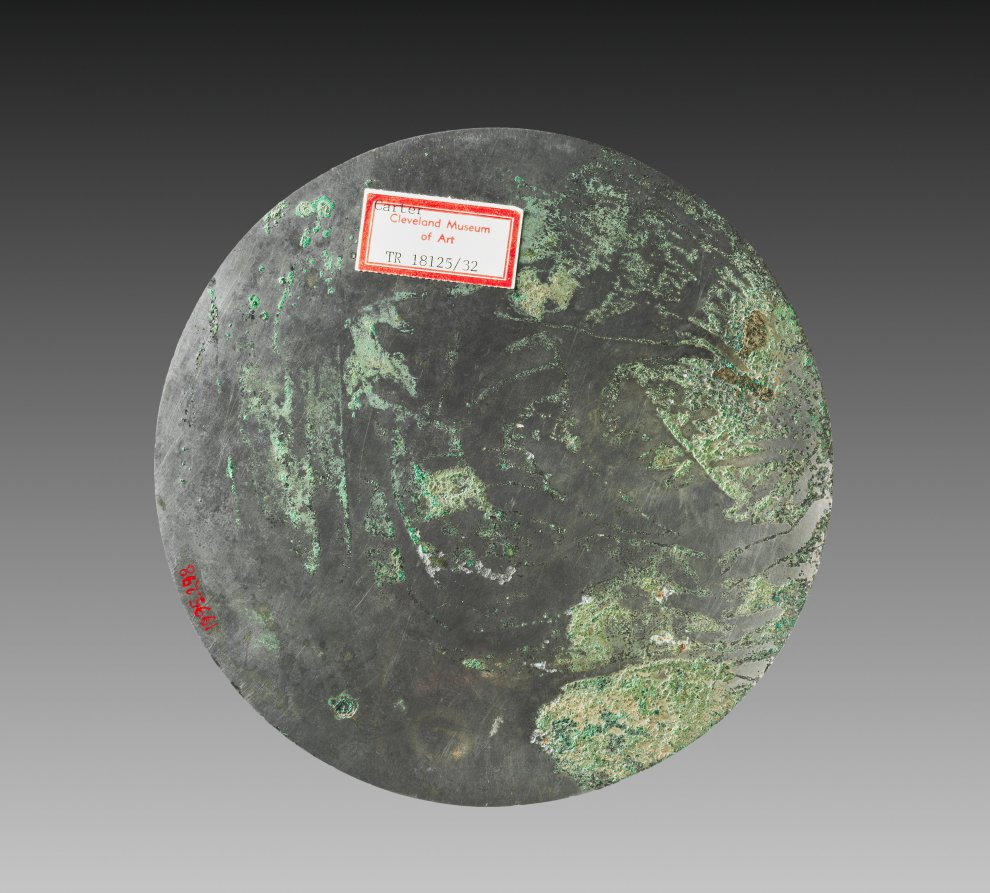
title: TLV Mirror with Multiple Nipples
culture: China, Xin dynasty (9–23 CE)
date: 9–23 CE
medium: bronze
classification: Metalwork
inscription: 作佳鏡哉真大好，上有仙人不知老。 渴飲玉泉飢食棗，浮遊天下傲四海。 壽如金石為國保。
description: The inscription in this mirror reads: A fine mirror it is, my making of it! I can show the ageless immortals up above. They wander over the earth and belittle the Four Oceans. They live as long as metal and stone, And are true protectors of our kingdom. These poetic lines suggest the reflective and magical qualities of the bronze mirror in the Chinese imagination. Besides reflecting the immortals, it illuminated the human soul so that it would be in tune with forces of yin and yang in Chinese cosmology.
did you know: This mirror includes a poetic inscription that credits the immortals as protectors of the kingdom.